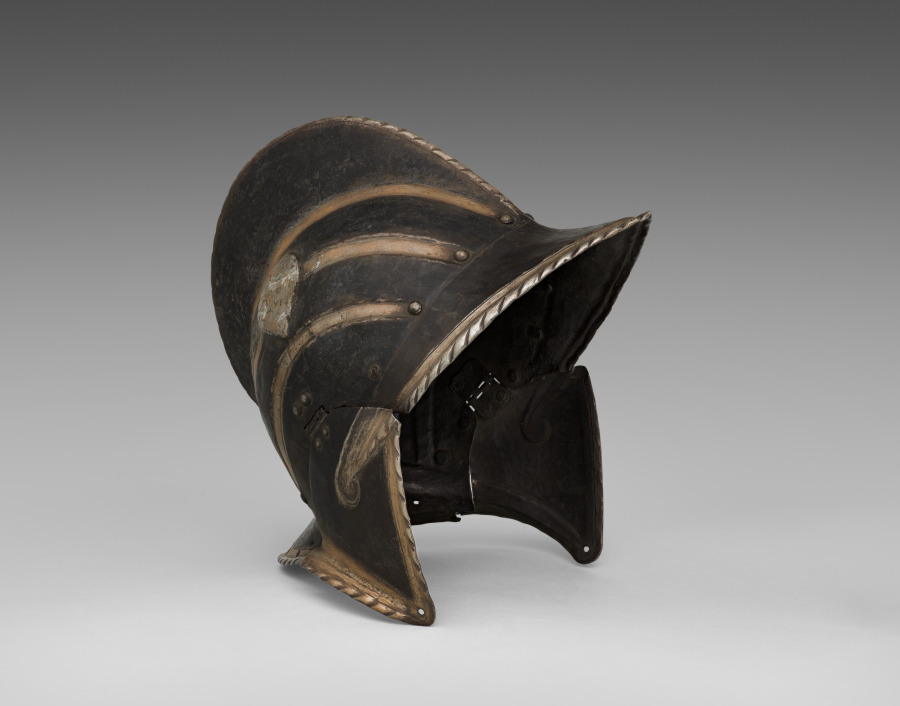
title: Black and White Burgonet (of the Civic Guard of Bologna)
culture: Italy, late 16th Century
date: c. 1580–1600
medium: steel with black paint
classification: Arms and Armor